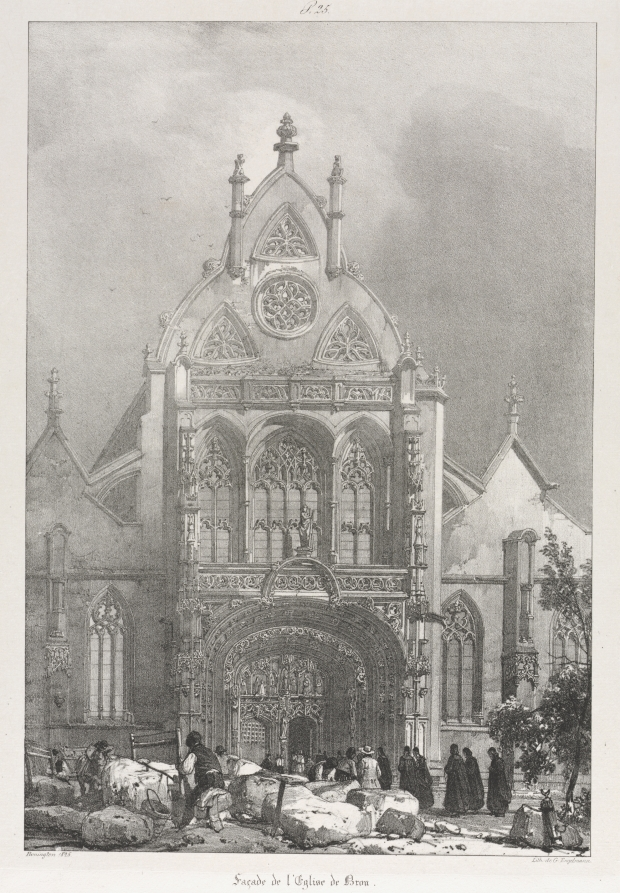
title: Picturesque and Romantic Trips in Old France, Franche-Compté: Front of the Church at Brou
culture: England, 19th century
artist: Richard Parkes Bonington (British, 1802–1828)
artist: after François Alexandre Pernot (French, 1793–1865)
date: 1825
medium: lithograph on chine collé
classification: Print